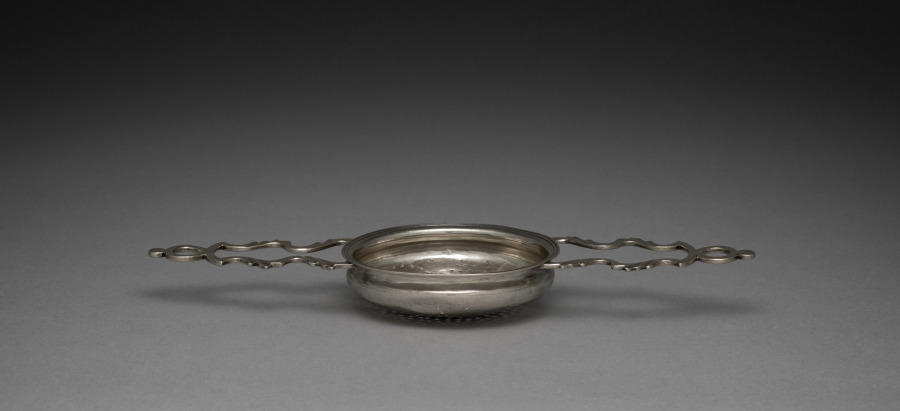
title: Strainer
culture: America, Massachusetts, Boston and Salem, 18th century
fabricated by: Daniel Parker (American, 1726–1785)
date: c. 1765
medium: silver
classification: Silver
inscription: engraved "H" over "B + H" in shaded block letters on side of bowl.